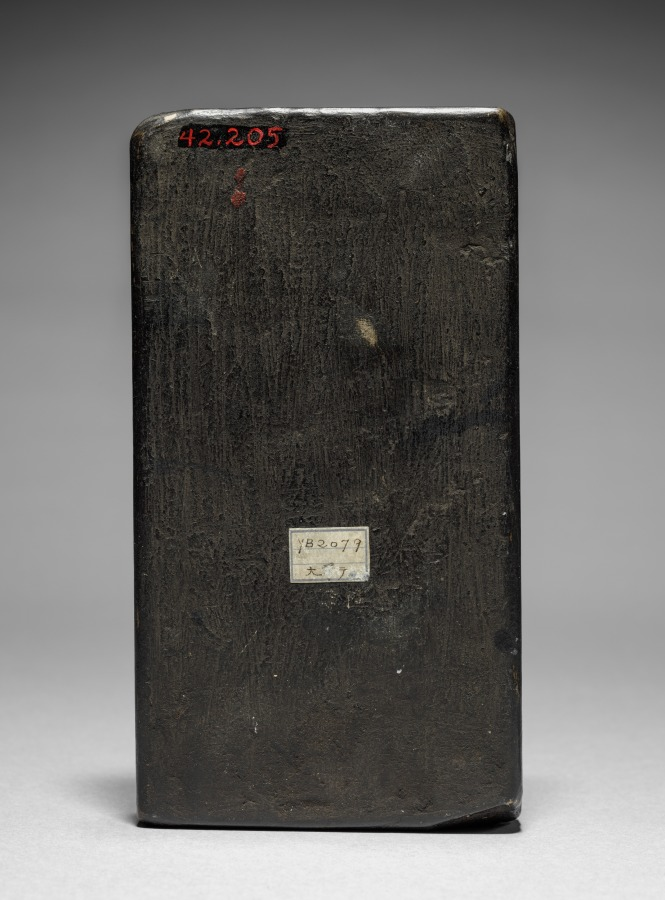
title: Ink Cake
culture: China, Ming dynasty (1368–1644)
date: 1368–1644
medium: ink cake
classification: Miscellaneous